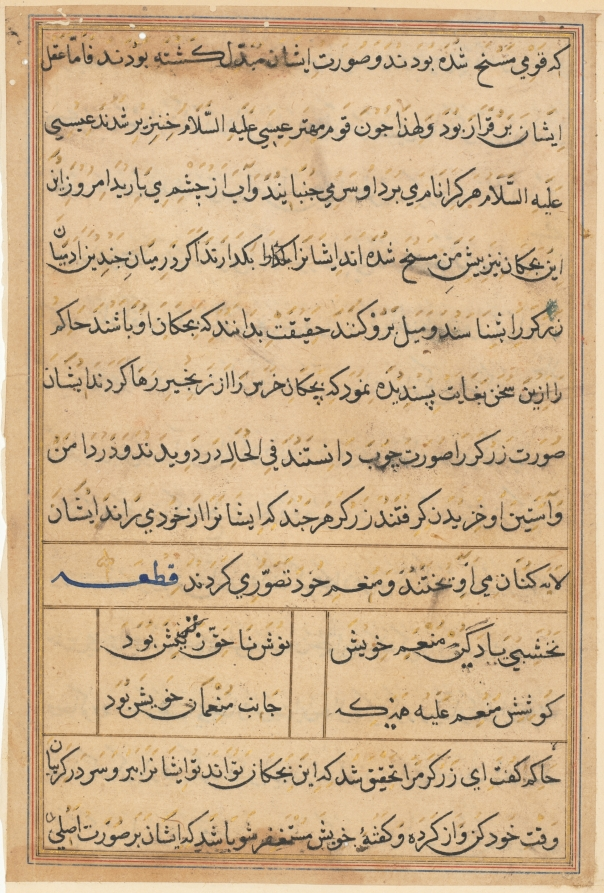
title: Page from Tales of a Parrot (Tuti-nama): text page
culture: Mughal India, court of Akbar (reigned 1556–1605)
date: c. 1560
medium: gum tempera, ink, and gold on paper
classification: Painting